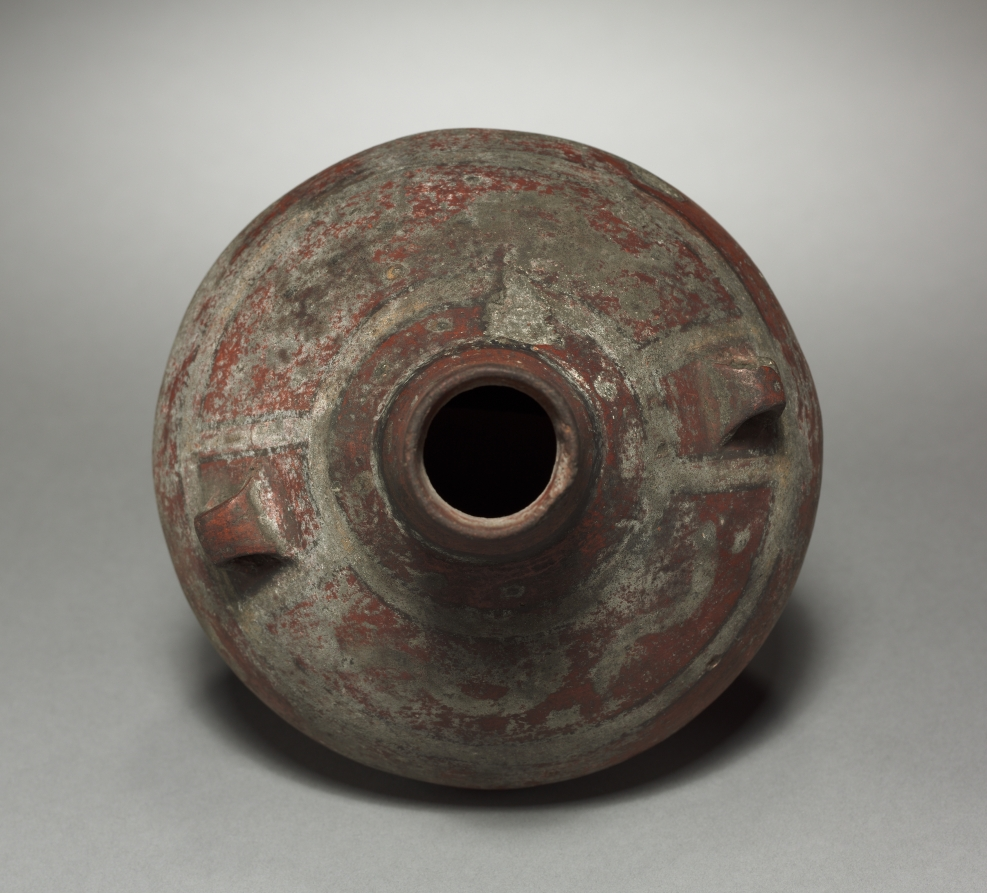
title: Bottle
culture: Peru, Pachacamac, Tiwanaku style, 400-1000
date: 400–1000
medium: pottery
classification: Ceramic